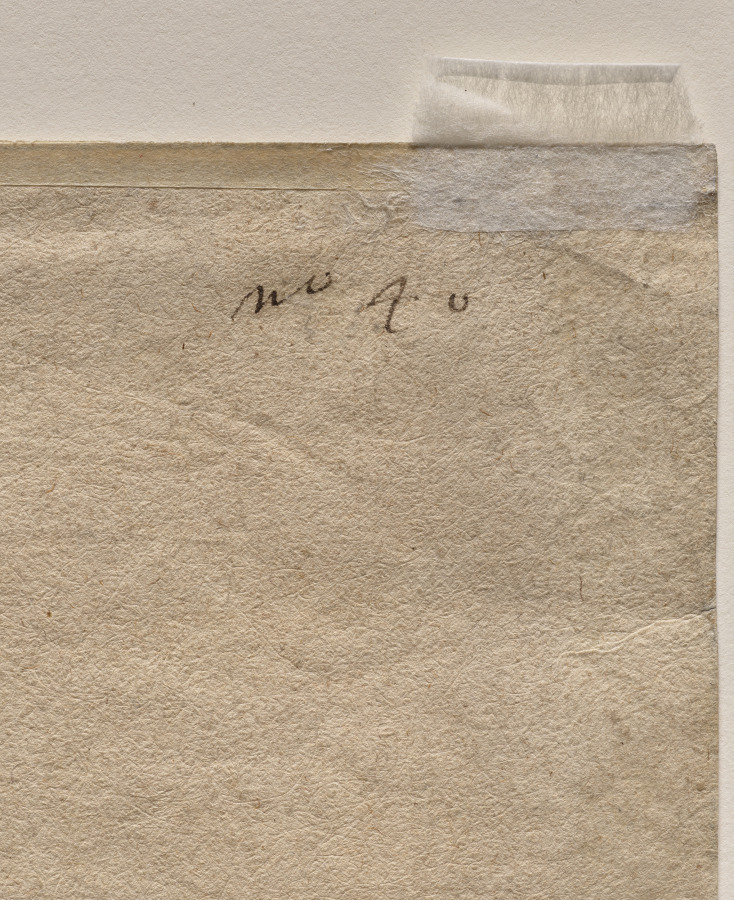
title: A Faun Grasping a Bunch of Grapes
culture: Flanders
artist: studio of Peter Paul Rubens (Flemish, 1577–1640)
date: after 1616–18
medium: black chalk and brush and brown wash; framing lines in pen and black ink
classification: Drawing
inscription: VERSO, upper right, in brown ink: no 40 ; lower left, in brown ink: 6/14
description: This drawing relates to a finished painting (now lost) by Peter Paul Rubens that depicted a faun (a woodland creature similar to a satyr) squeezing grapes into the mouth of a young Bacchus. That figure, shown here, could be Silenus, who educated Bacchus on the pleasures of wine, revelry, and nature. Rubens ran a large studio and employed numerous apprentices, one of whom may have made this copy after the original painting. As a form of instruction, Rubens added ink wash to the drawing to enhance the shading on the figure and shadows behind it.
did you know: Swirling draperies like the one haphazardly worn by this faun do more than conceal, in many cases they reveal an artist's technical skill. To render folds and gathers in fabric, artists used chiaroscuro, meaning contrasting light and dark tones.